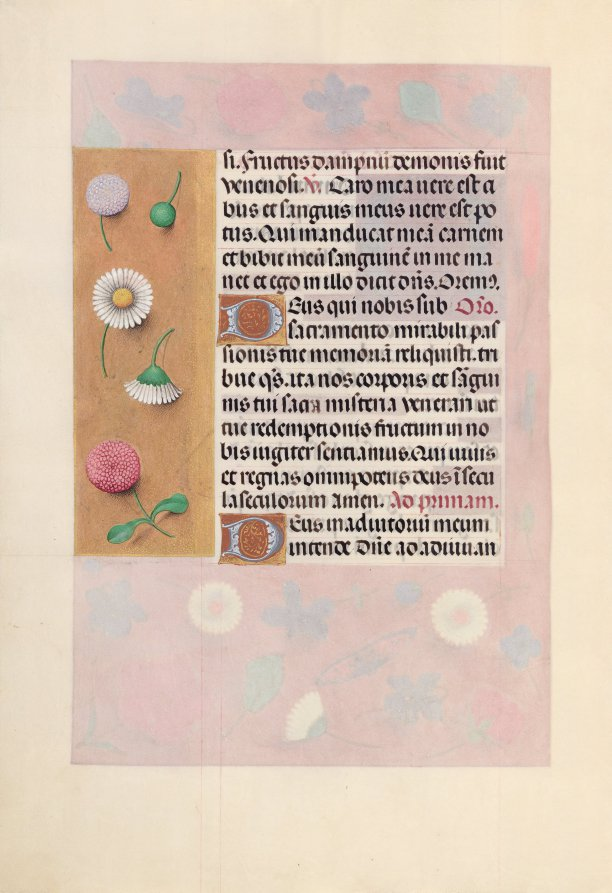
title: Hours of Queen Isabella the Catholic, Queen of Spain: Fol. 44v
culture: Flanders, Ghent and Bruges, late 15th century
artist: Master of the First Prayerbook of Maximillian (Flemish, c. 1444–1519)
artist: and Associates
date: c. 1500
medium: ink, tempera, and gold on vellum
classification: Bound Volume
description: This manuscript was illuminated by a circle of at least five highly organized manuscript painters active in the Flemish cities of Ghent and Bruges. The principal illuminator was Alexander Bening, who painted the majority of the book's miniatures. Manuscripts produced by this circle of artists are renowned for the decoration of their borders, which typically feature a rich variety of realistically-painted flowers, birds, and butterflies. This prayer book, called a book of hours, was intended not for a cleric, but for the private devotions of a lay person-in this case, Isabella the Catholic, Queen of Spain (1451-1504). Isabella's coat of arms embellishes the book's frontispiece. It is unlikely that the book was commissioned by the Queen herself; rather, she probably received it as a diplomatic gift from someone courting her patronage, perhaps Cardinal Francisco Jimenez de Cisneros. A Franciscan friar, Jimenez was dependent upon Isabella for his advancement, first to the post of Queen's confessor in 1492, and then to Archbishop of Toledo in 1495.